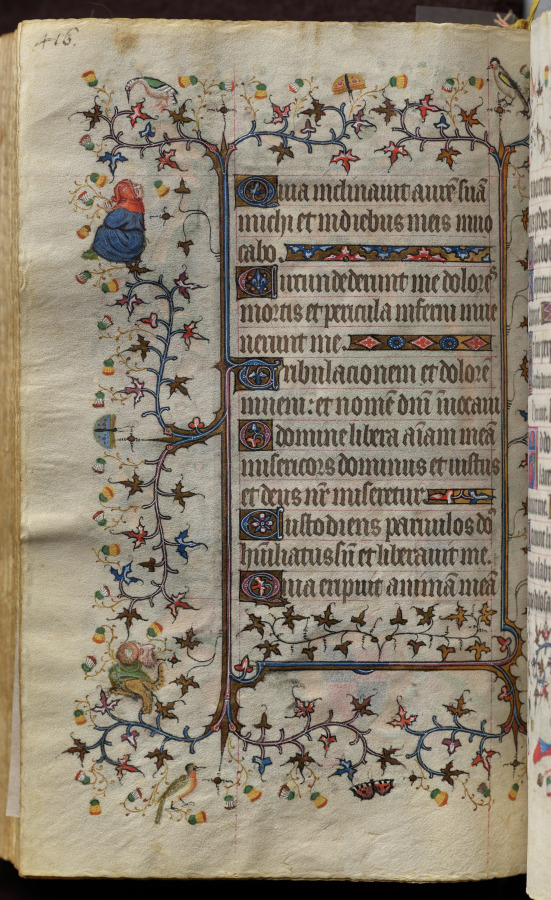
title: Hours of Charles the Noble, King of Navarre (1361-1425): fol. 202v, Text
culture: France, Paris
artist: Master of the Brussels Initials and Associates (French)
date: c. 1405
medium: ink, tempera, and gold on vellum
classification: Bound Volume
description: This precious volume was obviously highly prized by its owner, the French-born King of Navarre, who had his coat of arms painted on no less than twenty folios. Rather than directly commissioning this manuscript from a specific workshop, it seems that Charles the Noble acquired his book of hours -- perhaps ready-made for the luxury market -- while on a trip to Paris in 1404-05. A collaborative effort, six painting styles are evidenced within the pages of this codex, those of two Italians, two Frenchmen, and two Netherlanders. The painter who was responsible for the planning and decoration of the book, and who produced seventeen of the large miniatures, was a Bolognese artist known as the Master of the Brussels Initials. His principal assistant, responsible for most of the borders, was a Florentine who signed his name "Zecho" da Firenze on folio 208 verso.